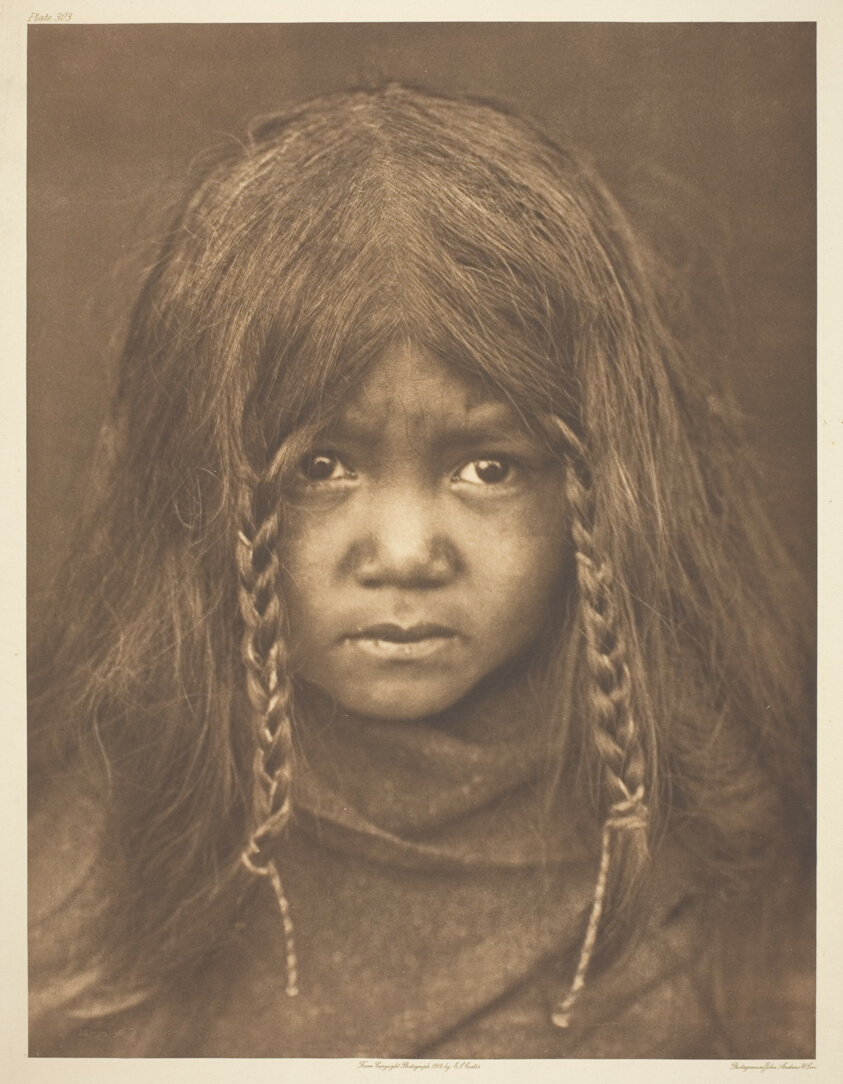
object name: Photograph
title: Quilcene Boy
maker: Edward S. Curtis (American, 1868–1952)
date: 1912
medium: Photogravure, plate 303 from "The North American Indian, Volume 9" (1913)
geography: United States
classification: photogravure; photomechanical process; photography; photograph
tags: portraits, portraits: Native American subject, photography, portraits: child subject